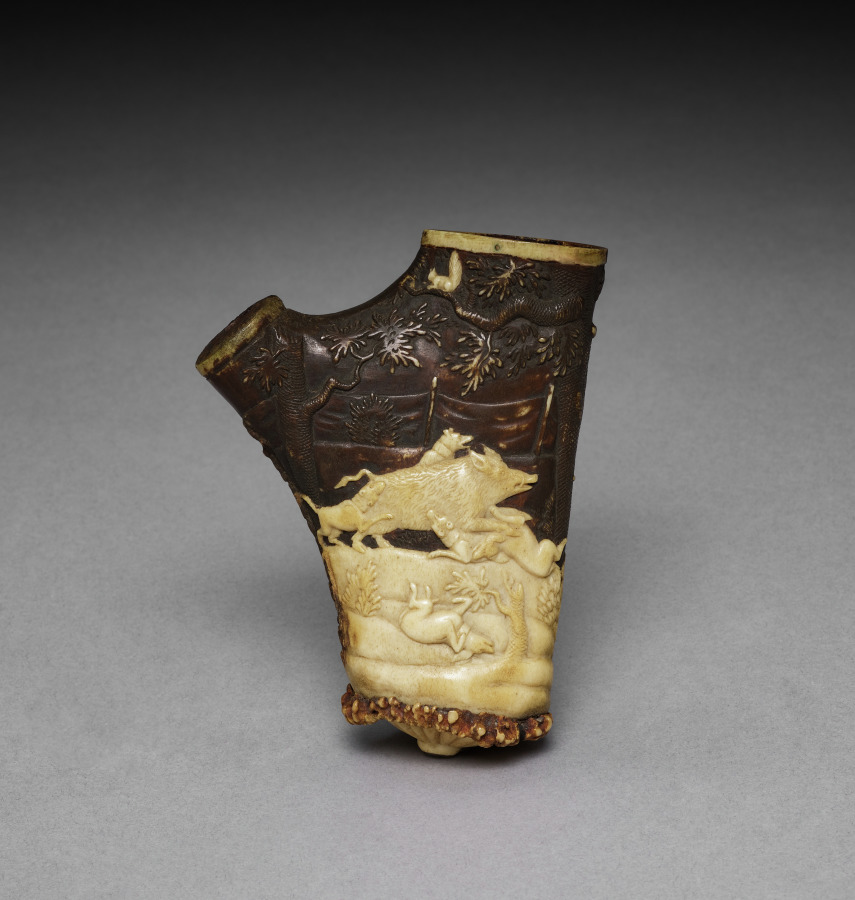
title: Primer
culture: Italy, 18th century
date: 1700s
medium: carved horn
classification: Arms and Armor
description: A priming flask is used to hold and pour fine gun powder into the priming pan of a gun. Scenes of hunting were a favorite decoration on these accessories.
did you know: This hunting accessory was carved out of horn.